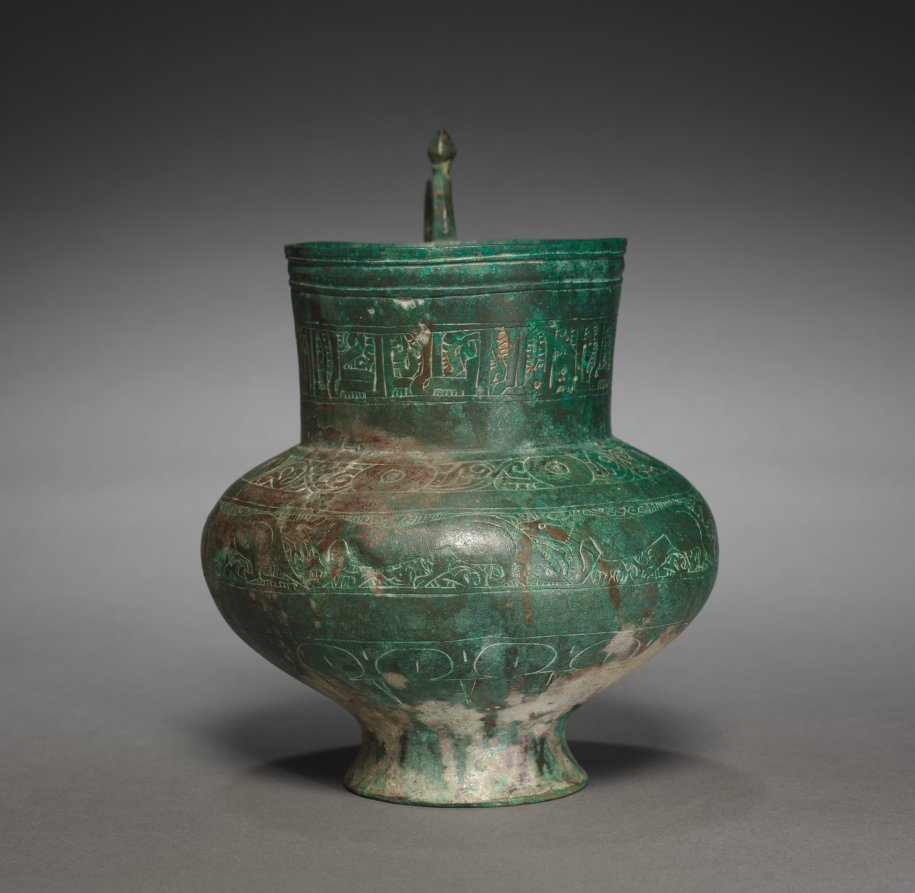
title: Jug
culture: Iran, Khurasan, Nishapur, Seljuk Period, 12th century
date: 1100s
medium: cast brass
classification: Metalwork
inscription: Kufic inscription, undeciphered